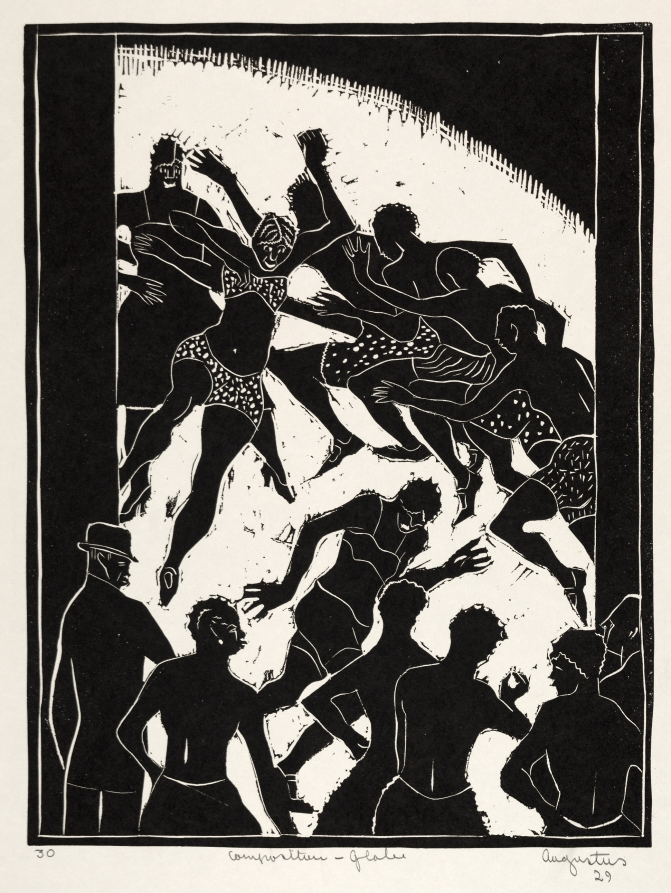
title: Composition - Globe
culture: America, Ohio, Cleveland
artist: Augustus Peck (American, 1906–1975)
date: 1929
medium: linoleum cut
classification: Print